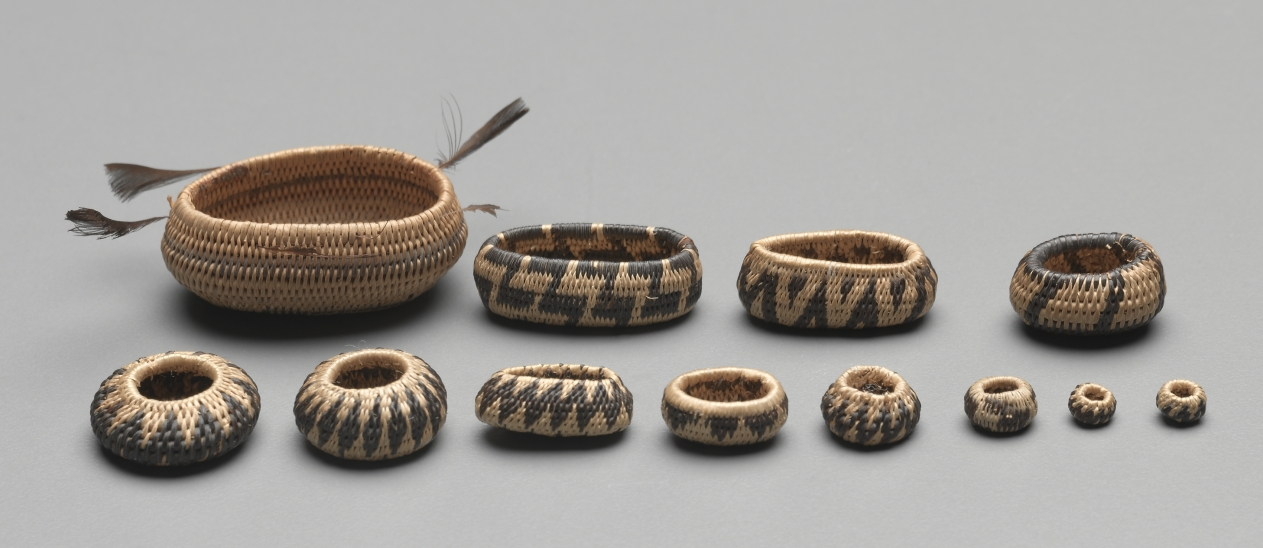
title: Miniature Round Basket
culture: California, Pomo, 20th century (?)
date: early 1900s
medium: coiled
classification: Basketry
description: Miniature baskets were made to demonstrate the basket maker’s virtuoso skill; these tiny marvels seem to be no exception—the smallest are just a few millimeters wide but still patterned. Such fine work required dexterity both in weaving and in harvesting and preparing the plant materials used to create the basket.